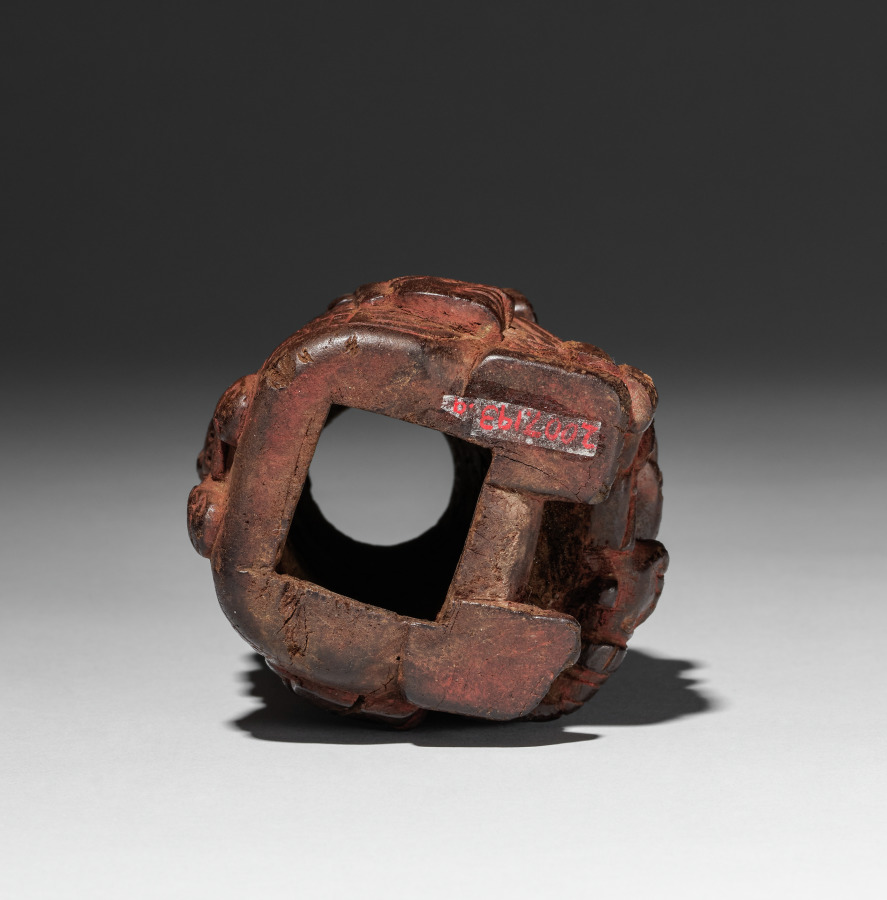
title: Container in the form of a Sacrificer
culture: Peru, Middle Horizon, Wari Culture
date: 770–890 (radiocarbon date, 95% probability)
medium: wood and red pigment (cinnabar)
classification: Wood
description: This container assumes the shape of a magnificent, feline-headed, supernatural sacrificer who draws a knife across the throat of the human it holds in its lap. Severed human heads hang from the feline's belt and dangle by the trachea at the back of its headdress. Sacrifice had a place in Wari religious practice, probably as an unusual and exceptionally precious offering made to entice the benevolence of cosmic forces. Indeed, colonial-period Andean people believed that death was a prerequisite for the renewal of the world.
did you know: Traces of cinnabar, a toxic mercuric sulfide, are visible on the container's surface.